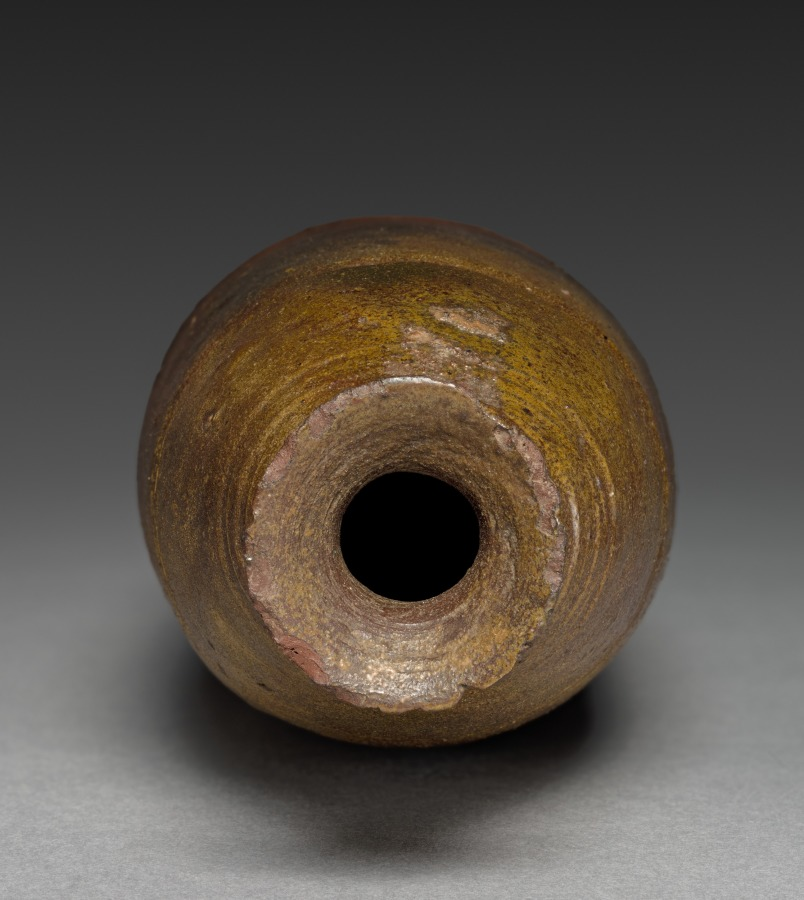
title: Sake Bottle: Ryukyu Namban Ware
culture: Japan, Edo period (1615–1868)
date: 1700s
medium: Ryukyu Namban Ware: stoneware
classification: Ceramic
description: Note the rich color gradations over the body that range from a deep brown to olive to ochre to a rust-red. The incised and gouged markings on the bottle contribute to its rustic texture.